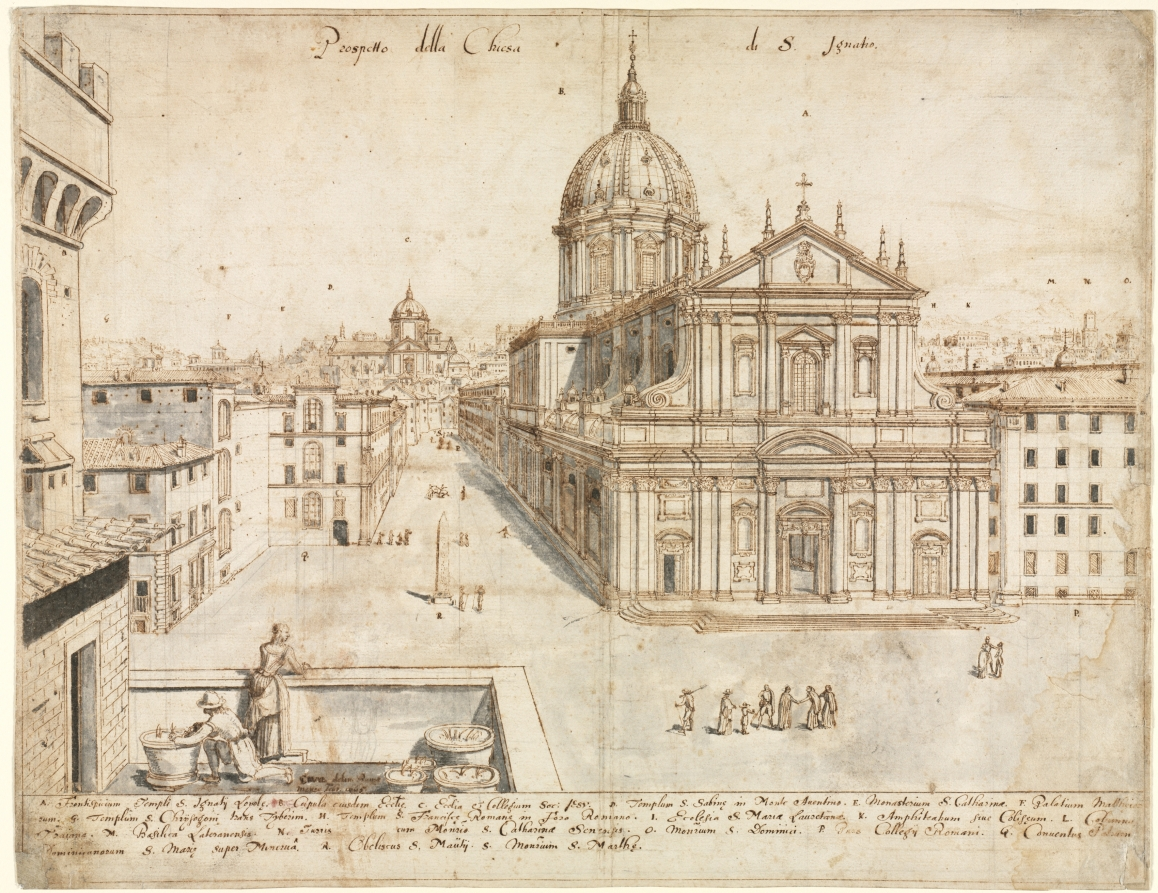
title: Eighteen Views of Rome: The Church of Sant'Ignazio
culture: Flanders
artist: Lievin Cruyl (Flemish, c. 1640-c. 1720)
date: 1665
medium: pen and brown ink and brush and gray wash over graphite; framing lines in brown ink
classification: Drawing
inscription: signed, lower left, in brown ink: [artist's monogram: LC] RVYL delin. Romæ / mense Febr. 1665 ; by artist, upper center, in brown ink: Prospetto della Chiesa di S. Ignazio ; by artist, throughout composition, in brown ink: [the letters A-S] ; by artist, across bottom, in brown ink: A. Frontispicium Templi S. Ignatij Loyolæ. B. Cupula eiusdem Eccliæ. C. Ecclia et Collegium Soc: Jesu. D. Templum S. Sabinæ in Monte Aventino. E. Monasterium S. Catherinæ. F. Palatium Mattheio= / rum. G. Templum S. Chrijsogoni trans Tyberim. H. Templum S. Franciscæ Romanæ in Foro Romano. I. Ecceslia S. Mariæ Lauretanæ. K. Amphiteatrum sive Colisseum. L. Colonna / Traiana. M. Basilica Lateranensis. N. Turris cum Monrio. S. Catherinæ Senensis. O. Monrium S. Dominici. P. Pars Collegij Romani. Q. Conventus Patrium / Dominicorium S. Mariæ super Minervâ. R. Obeliscus S. Maürtij. S. Monrium S. Marthæ. ; VERSO, upper left, in brown ink [S45..?][masked] ; upper left, in graphite: n. 545 ; ON STRIPS OF PAPER MOUNTED TO VERSO, lower right, in graphite: A20978 ; lower right, in graphite: E. 12